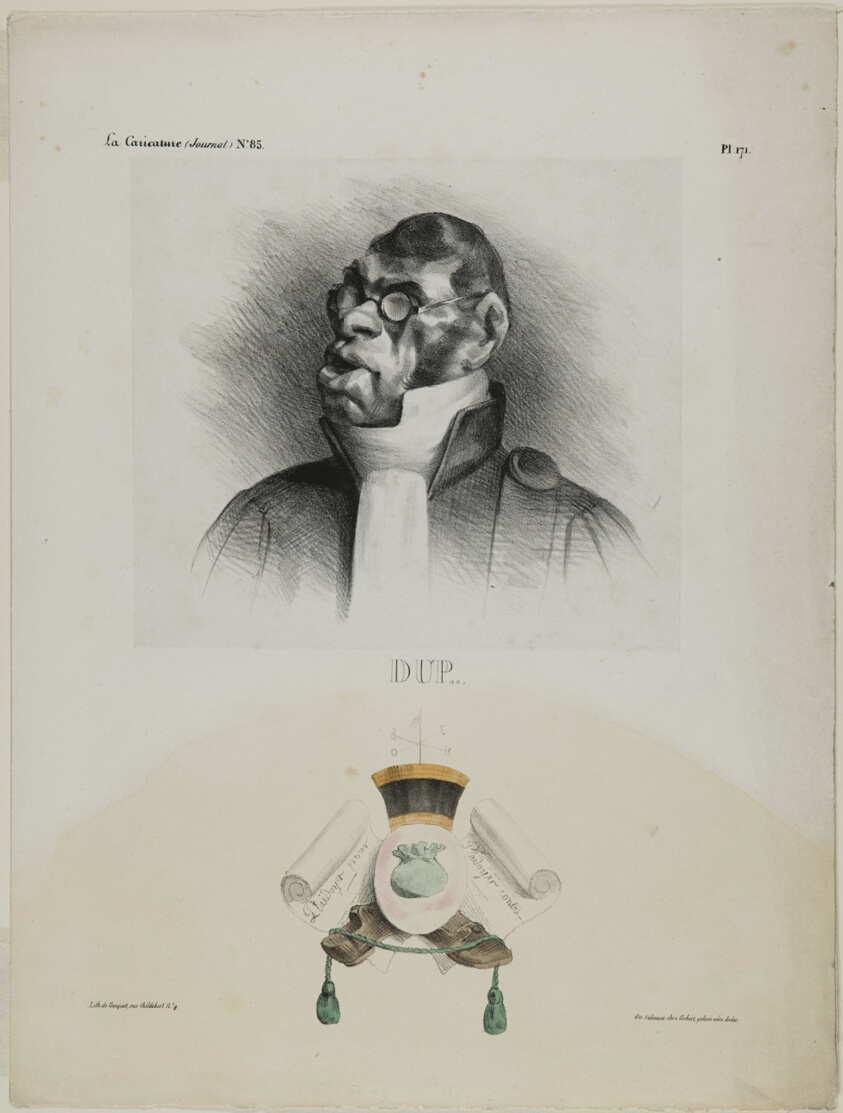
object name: Print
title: Dup…, plate 171 from Célébrités de la Caricature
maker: Honoré Victorin Daumier; French, 1808-1879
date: 1832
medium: Lithograph in black, with hand-coloring, on cream wove paper, laid down on ivory wove paper (chine collé)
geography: France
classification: lithograph; print; prints and drawing